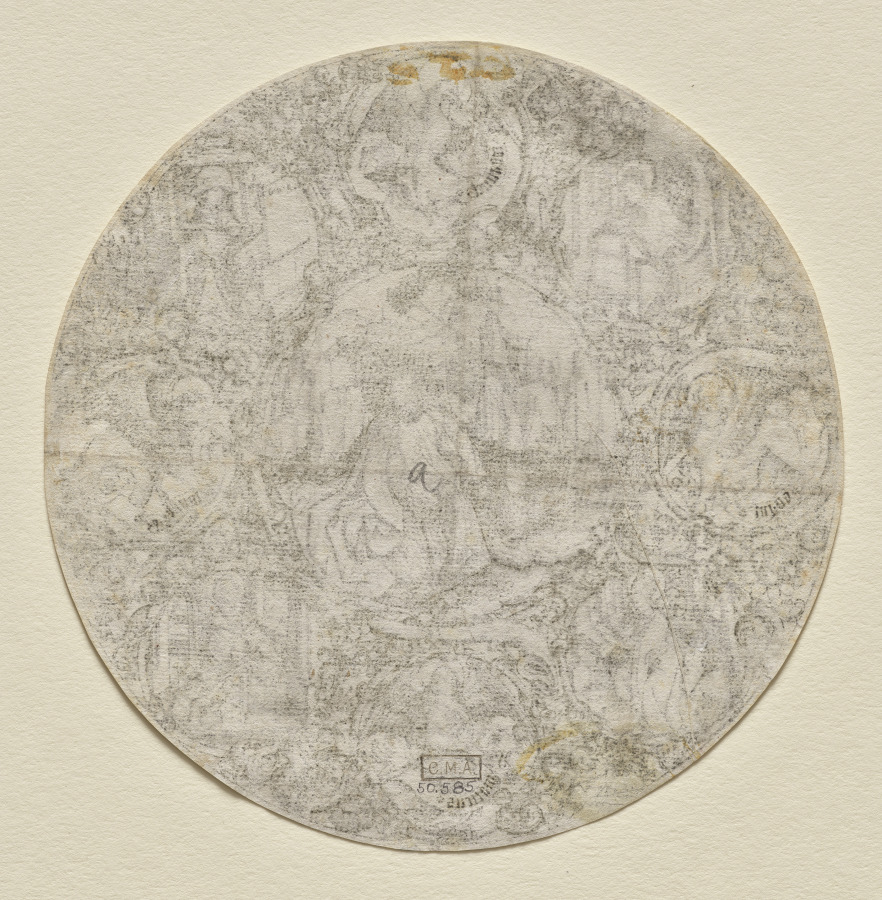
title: St. John the Baptist Surrounded by the Evangelists and Four Fathers of the Latin Church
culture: Germany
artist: Master ES (German, active 1450–67)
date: 1466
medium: engraving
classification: Print